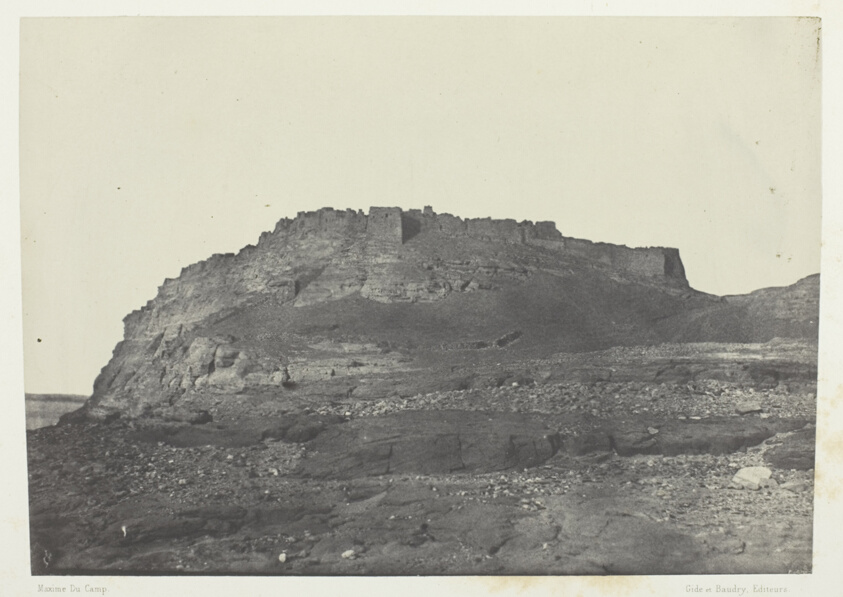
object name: Photograph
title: Forteress D'Ibrym (Ancienne Premmis), Vue Prise Au Sud; Nubie, plate 100 from the album "Egypte, Nubie, Palestine et Syrie" (1852)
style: 19th century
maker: Maxime Du Camp (French, 1822–1894)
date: 1849/51, printed 1852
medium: Salted paper print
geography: France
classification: salted paper print; photographic process; photography; photograph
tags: Collected by Hugh Edwards, Egypte, Nubie, Palestine et Syrie